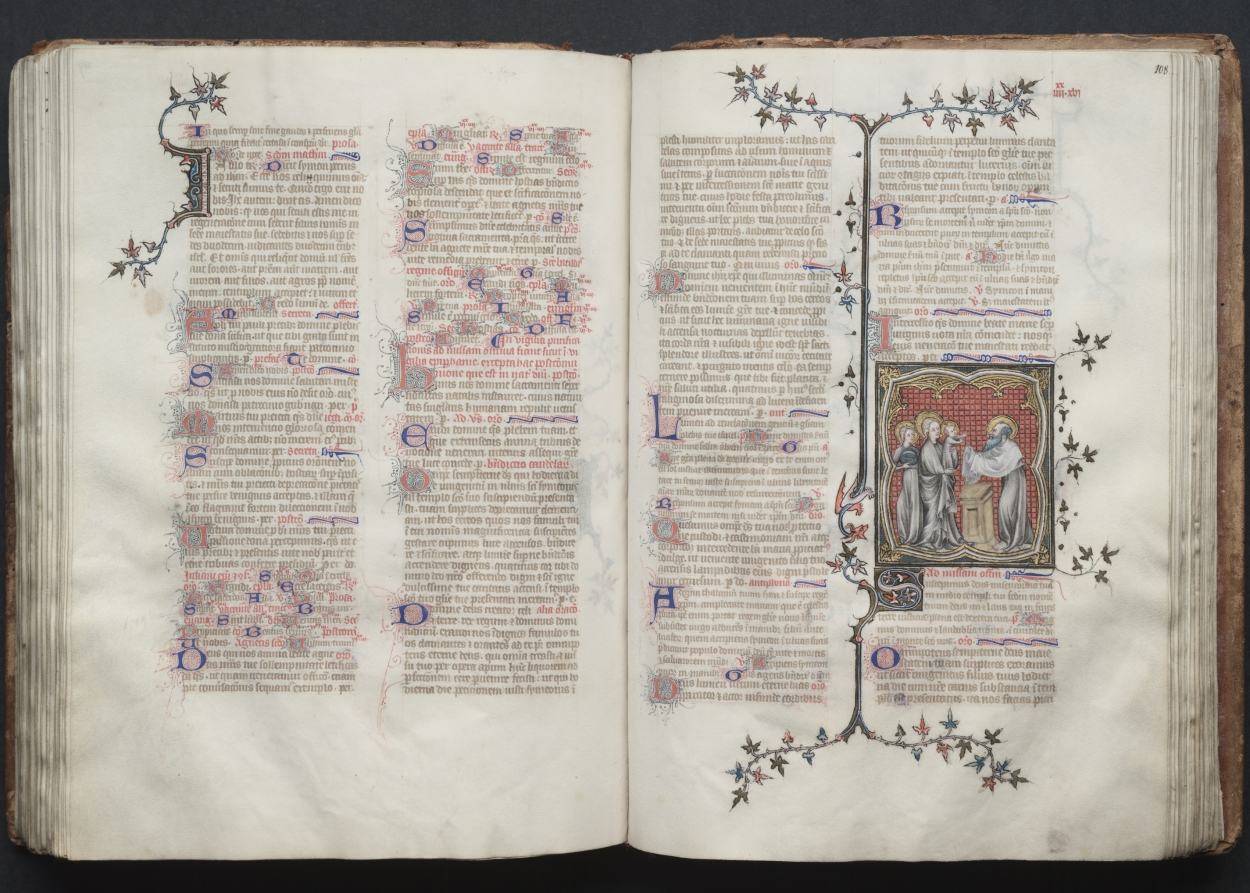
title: The Gotha Missal: Fol. 108r, The Presentation in the Temple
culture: France, Paris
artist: Master of the Boqueteaux (French)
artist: and Workshop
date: c. 1375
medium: ink, tempera, and gold on vellum; blind-tooled leather binding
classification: Bound Volume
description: The style and quality of this manuscript's decoration is typical of deluxe Parisian books made for aristocratic or royal patrons. Most of the book's decoration appears to be the work of the Master of the Boqueteaux, an artist active at the court of King Charles V (died 1380). His style was apparently shared by a number of book illuminators working in and around Paris. It is very possible that the Gotha Missal belonged to Charles V, but is not provable because the manuscript has no royal portraits and lacks a colophon. Given the book's magnificent decoration, however, it would seem that it was produced for a Valois prince, if not for the king himself. The manuscript receives its name from the German dukes of Gotha, its later owners.